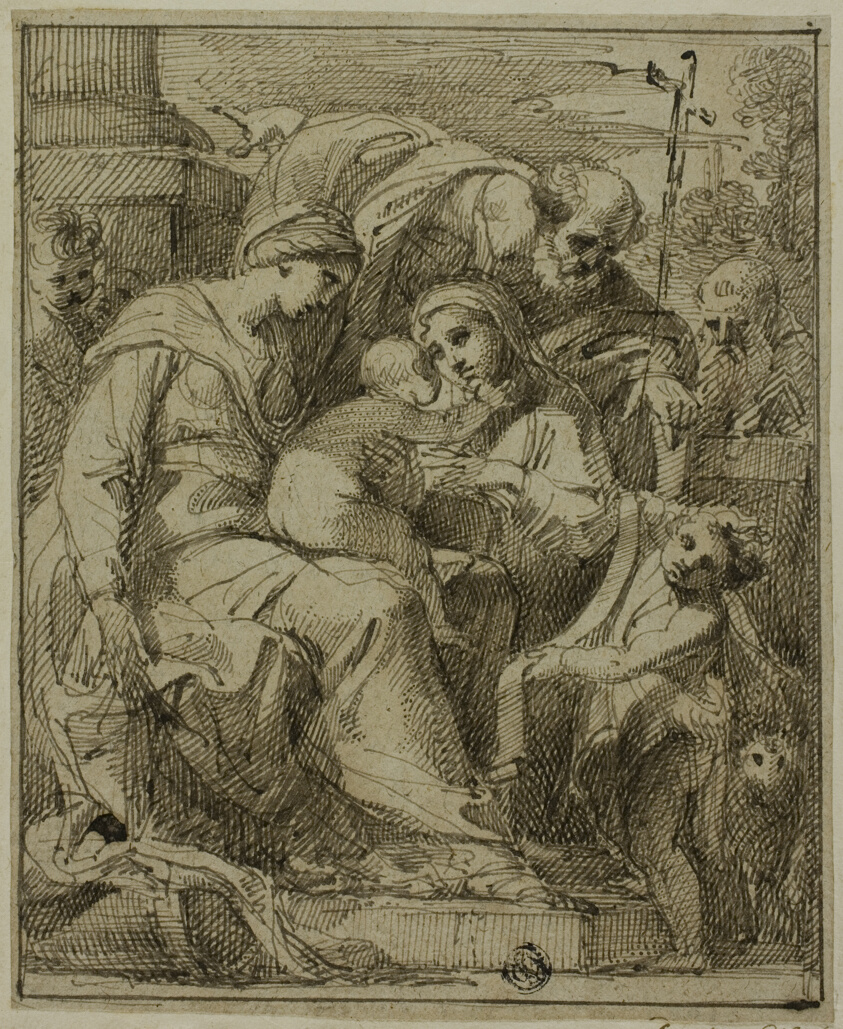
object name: Drawing and Watercolor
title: Holy Family with Female Saint and Infant Saint John the Baptist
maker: Giuseppe Santi (Italian, 1761-1825)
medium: Pen and brown ink, on tan laid paper, laid down on ivory wove paper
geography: Italy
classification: pen and ink drawings; drawings (visual works); prints and drawing